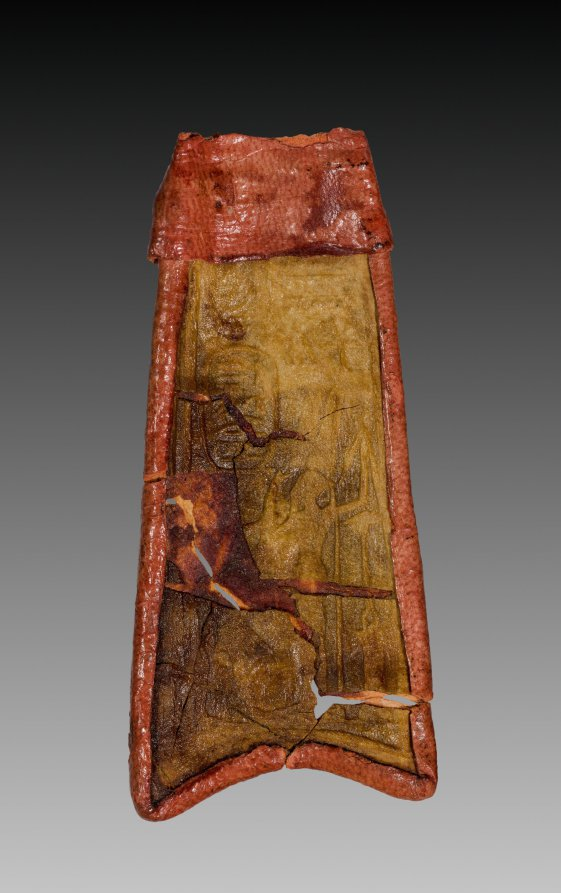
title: Tab from Mummy Band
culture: Egypt, Third Intermediate (1069–715 BCE), Dynasty 22, reign of Osorkon I (992–887 BCE)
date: 945–715 BCE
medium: stained leather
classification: Funerary Equipment